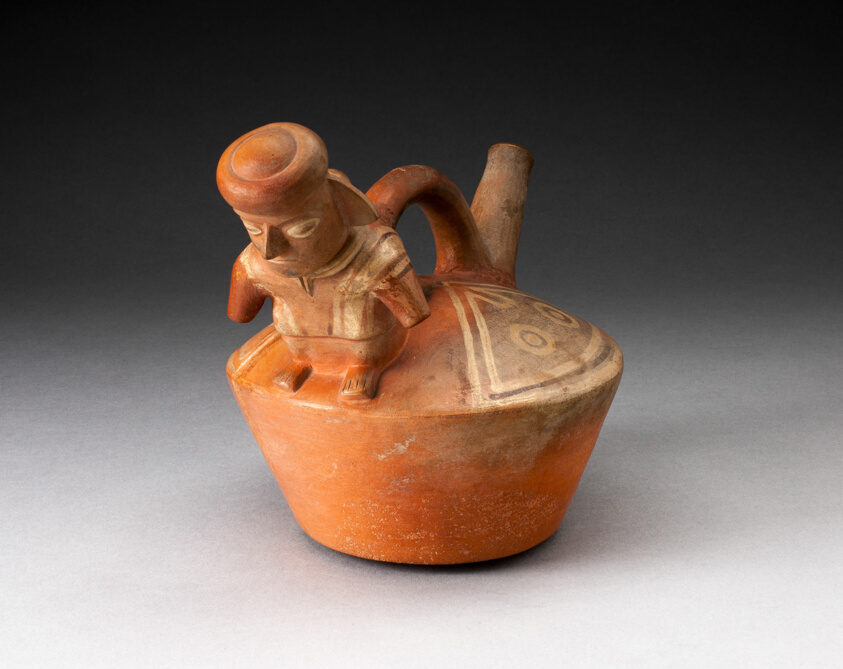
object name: Vessel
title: SIngle Spouted Vessel with Sculpted Figure Attached to the Handle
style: moche, mochica i, mochica, early intermediate period, Pre-Columbian, americas, Arts of the Americas, andean, andes, south american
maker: Moche (North coast, Peru)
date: 100 BCE–500 CE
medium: Ceramic and pigment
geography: Peruvian North Coast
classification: earthenware; ceramics; vessel; art of the americas